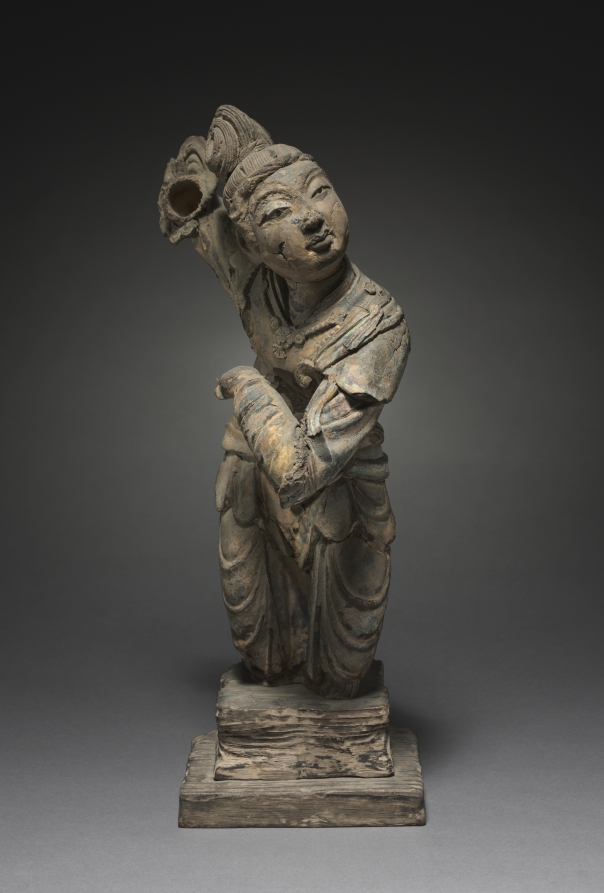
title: Dancing Apsaras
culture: China, late Tang dynasty (618–907) to Five dynasties (907–960)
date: 900s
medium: dry lacquer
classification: Sculpture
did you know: The sculpture was made from a rare technique involving alternate layers of cloth and lacquer, modeled on an armature or around a removable clay core.